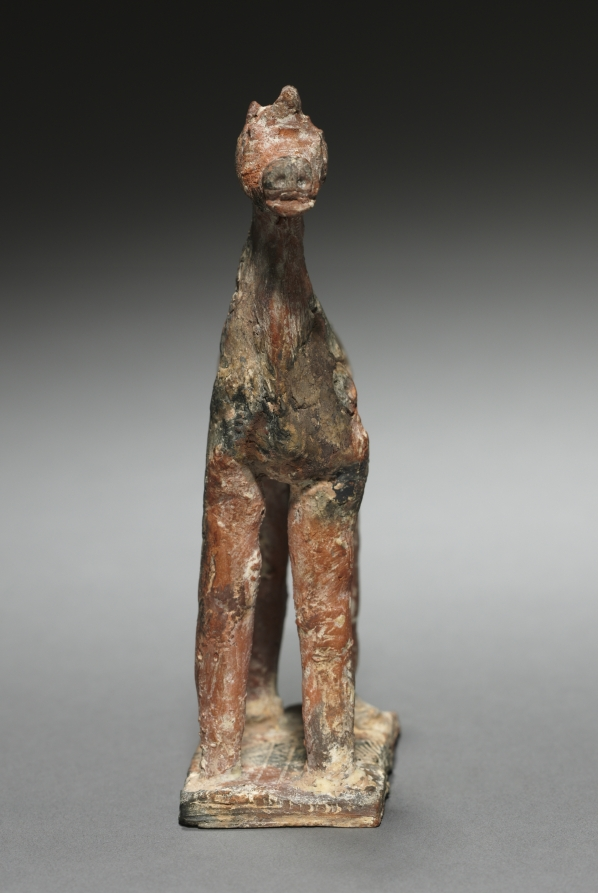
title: Horse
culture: Greece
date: c. 750–725 BCE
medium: terracotta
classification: Sculpture